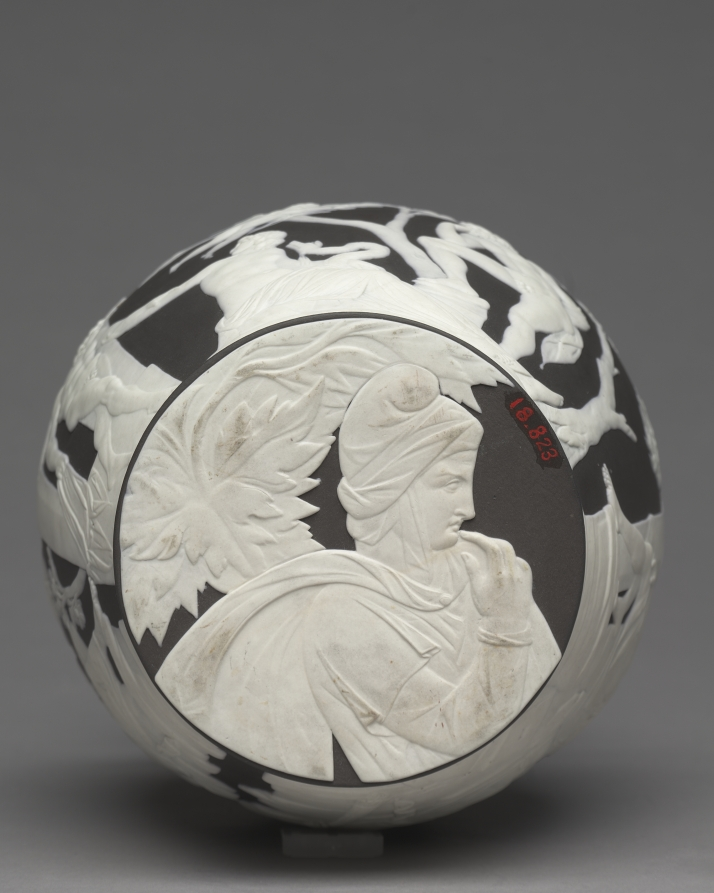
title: Portland Vase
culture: England, Staffordshire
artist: Josiah Wedgwood and Sons (Britain, Staffordshire, est. 1759)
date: c.1790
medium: jasperware with applied decoration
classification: Ceramic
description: The original Portland Vase is a Roman antiquity, made of dark-blue glass, dating from the first century AD. Such a rare archaeological find fascinated aristocratic collectors and artists alike, and eventually the vase came into the hands of the 3rd Duke of Portland in the 1780s. Around 1790 the duke lent the vase to the potter Josiah Wedgwood to make exact replicas in ceramic, of which the Cleveland example is one of the first editions. Eventually, the 4th Duke of Portland deposited the original Roman vase in the British Museum, where it resides today.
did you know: While the scene depicted here is not known for certain, many scholars believe that the Portland Vase portrays the wedding of Peleus and Thetis from Greek mythology.